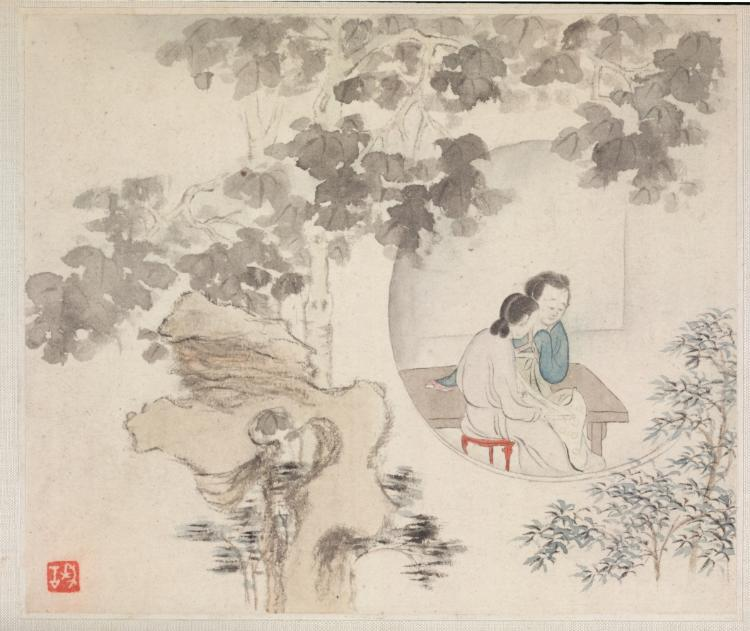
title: Album of Landscape Paintings Illustrating Old Poems: Two Women with Needlework in a Garden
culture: China, Qing dynasty (1644-1911)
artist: Hua Yan (Chinese, 1682–c. 1765)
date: 1745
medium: Album leaf; ink and light color on paper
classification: Painting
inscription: Seal, lower left corner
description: Two women doing needlework are confined in an interior space. The other 11 paintings in this Hua Yan album show men in nature. The women may experience the natural world only through the large moon-shaped window open to a garden. Prominently displayed in the garden is a Taihu stone, like CMA 2022.23. Taihu stones are valued for their natural shapes and sculptural qualities and are a cultural peculiarity. These perforated limestones were originally sourced from Lake Tai in southeast China from where they got their names. Large ones were set up like sculptures in gardens, like the one in this painting.